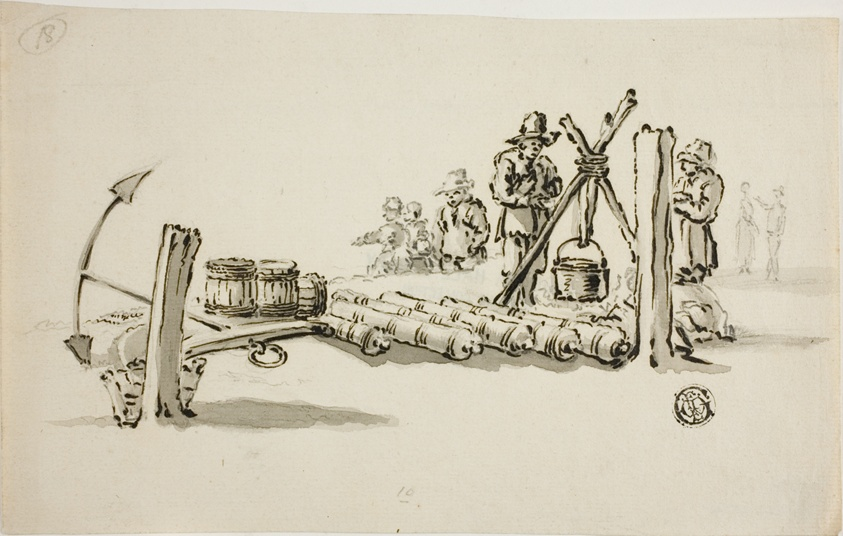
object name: Drawing and Watercolor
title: Men with Cannons, Kegs of Powder and an Anchor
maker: Willem van d Velde, I; Dutch, c. 1611-1693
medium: Pen and brown ink with brush and gray wash, over graphite, on ivory laid paper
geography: Holland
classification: pen and ink drawings; drawings (visual works); prints and drawing